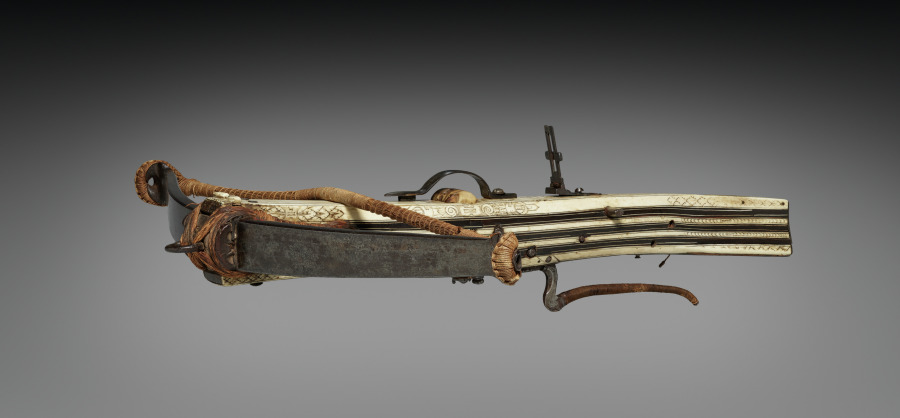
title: Crossbow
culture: Germany, early 17th Century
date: early 1600s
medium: wood, stag horn, flax cord and steel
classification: Arms and Armor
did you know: The decoration of four strips of inlaid horn was quite rare.